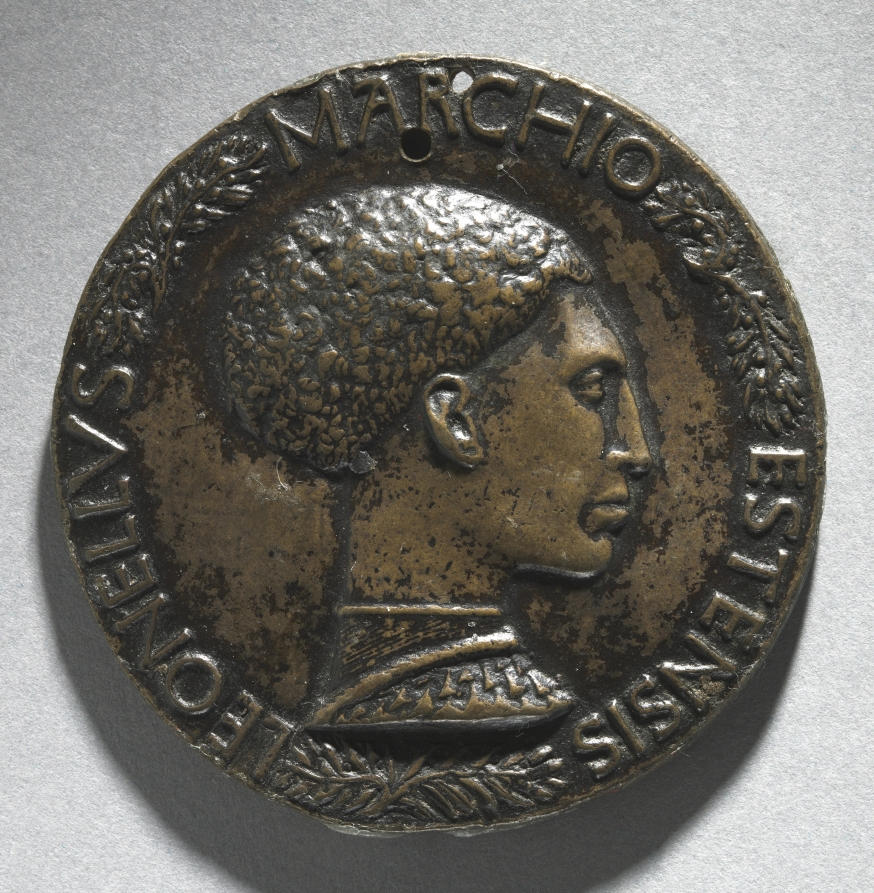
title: Portrait of Leonello D'Este, Marquess of Ferrara (obverse)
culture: Italy, 15th century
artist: Pisanello (Italian, Ferrara, c. 1395–1455)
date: c. 1440–1444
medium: bronze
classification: Sculpture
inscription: obverse: LEONELLVS MARCHIO ESTENSIS, separated by olive branches.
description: Renaissance medals usually show a person on the front and a symbolic element on the back, creating an overall statement about the individual. Lionello d'Este was one of the most sophisticated patrons in Renaissance Italy, and he was one of the first figures to sponsor the tradition of medals in the 1400s.